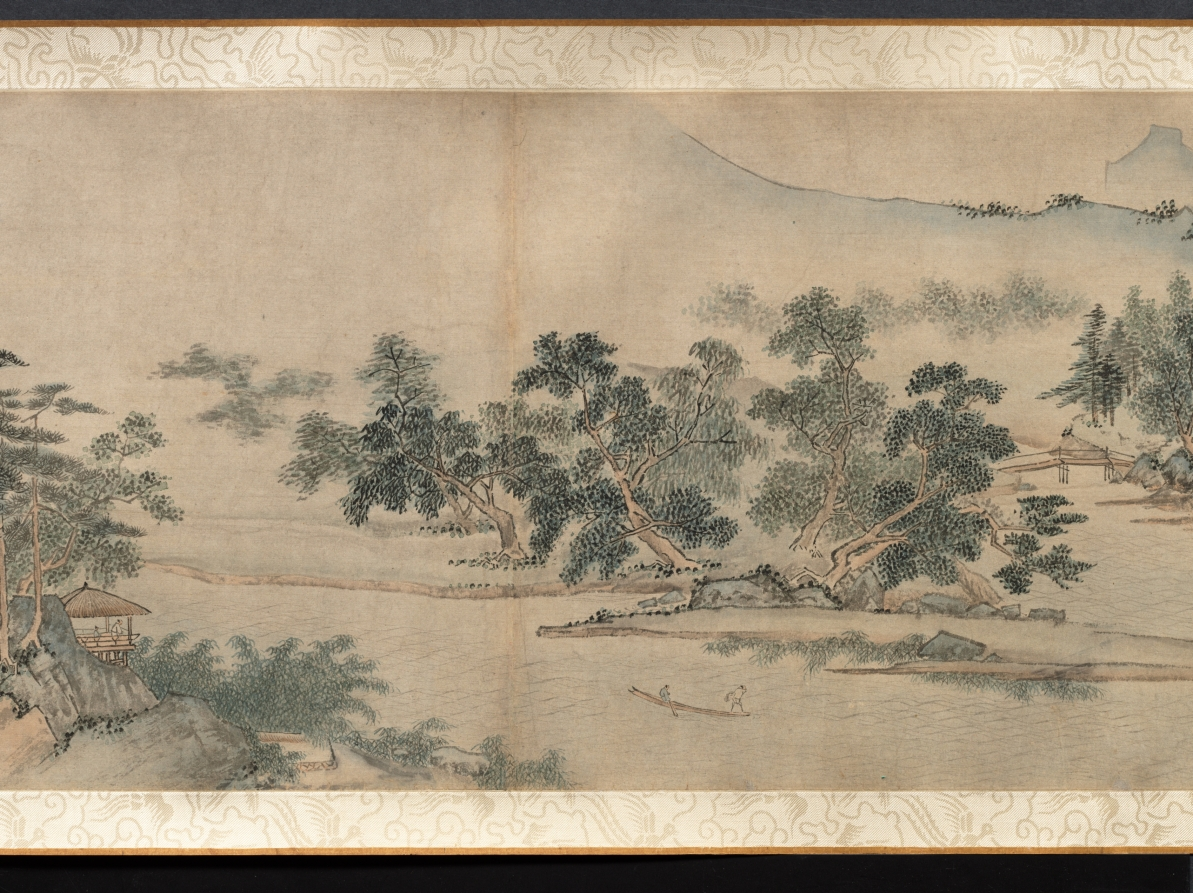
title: Ten Thousand Li of the Yangzi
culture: China, Ming dynasty (1368–1644)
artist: Dai Jin (Chinese, 1388–1462)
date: c. 1400s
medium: Handscroll; ink and color on paper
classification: Painting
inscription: Two colophons at end. Artist's seals: Dai Jin 戴進 and Wenjin 文進.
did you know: Dai Jin is traditionally considered the founder of the Zhe School, a style of landscape painting.